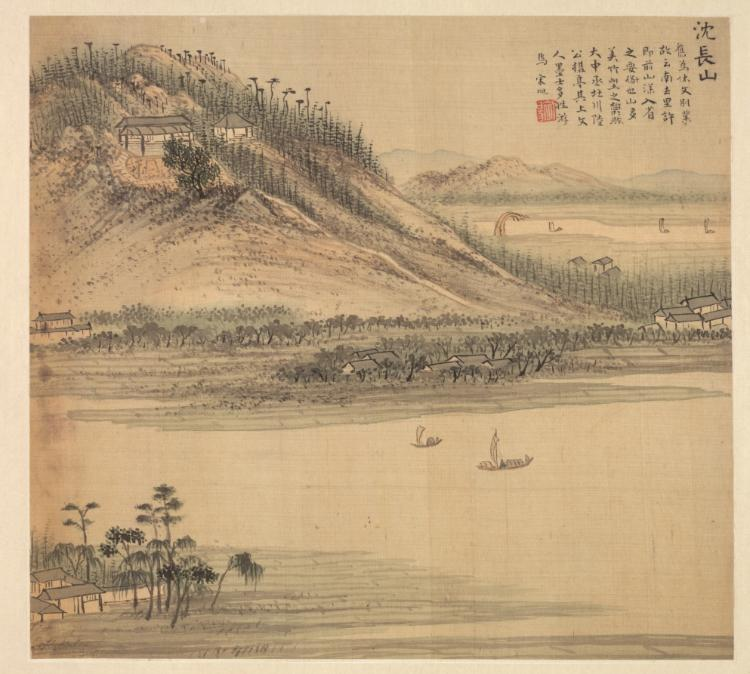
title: Mt. Shenchang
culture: China, Jiaxing, Ming dynasty (1368–1644)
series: Eighteen Views of Huzhou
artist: Song Xu (Chinese, 1525-c. 1606)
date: c. 1588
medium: Album leaf; ink and color on silk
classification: Painting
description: By the 1500s, visits to historic and scenic sites in the lower Yangzi delta stimulated an increase of printed illustrated travel books. Topographical depictions of local scenery flourished. Leaves from this album illustrates sites around Lake Tai of the two adjacent counties Changxing and Wuxing (modern Huzhou). Song Xu, who lived intermittently in Jiaxing and Songjiang, must have passed through Wuxing by boat and thus knew the region. The paintings are inscribed with gazetteerlike notations, suggesting that the album was produced for clients as commemorative works, a travel guide, or for “armchair travel” (woyou) in one’s mind.